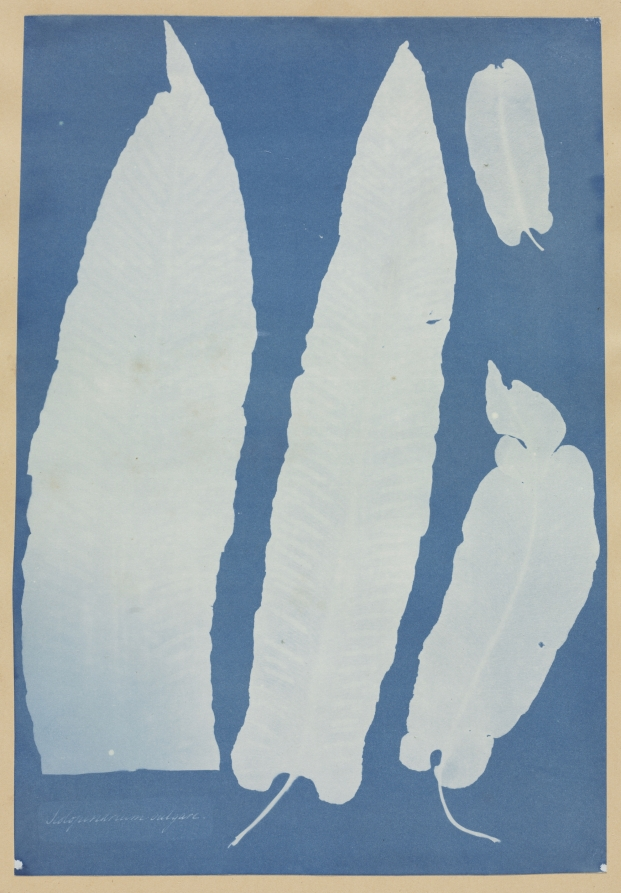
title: Scolopendrium Vulgare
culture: England, 19th century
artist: Anna Atkins (British, 1799–1871)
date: 1852–54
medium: cyanotype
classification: Photograph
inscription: Written in negative: "Scolopendrium Vulgare"; in pencil on verso: "87"; "1.8"; "1258.4"; MC"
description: In 1843, Anna Atkins produced the first book illustrated with photographs. The book was the earliest use of photography in a scientific publication. An amateur botanist, Atkins overcame the difficulties of making accurate drawings by placing plants directly on light-sensitive paper and exposing them to light. With these cameraless photographs, later called photograms, she was able to carefully record the basic elements of a plant's line, shape, and texture. This example illustrates a specimen of Scolopendrium Vulgare, also known as Hart's-Tongue fern.